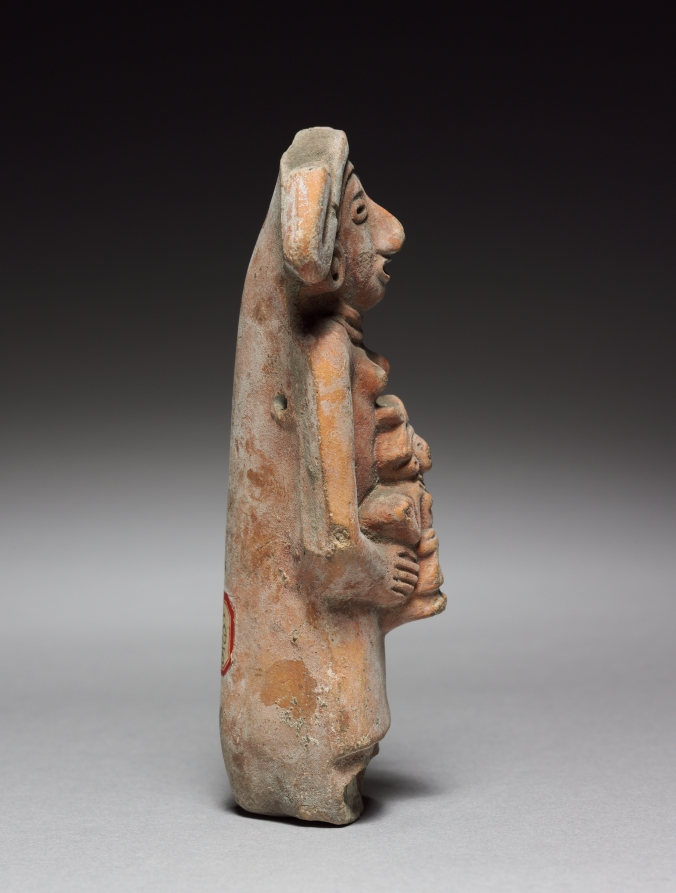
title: Mother-and-Child Figurine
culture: Mexico, Aztec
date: 1325–1521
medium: Ceramic, pigment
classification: Ceramic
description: The hair of this hollow, mold-made, female figurine was originally arranged in two projections atop the head. She carries an identical, small figure interpreted as a child; the figurine may be a metaphor for generational continuity.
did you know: This mother-and-child figurine may be a metaphor for generational continuity.